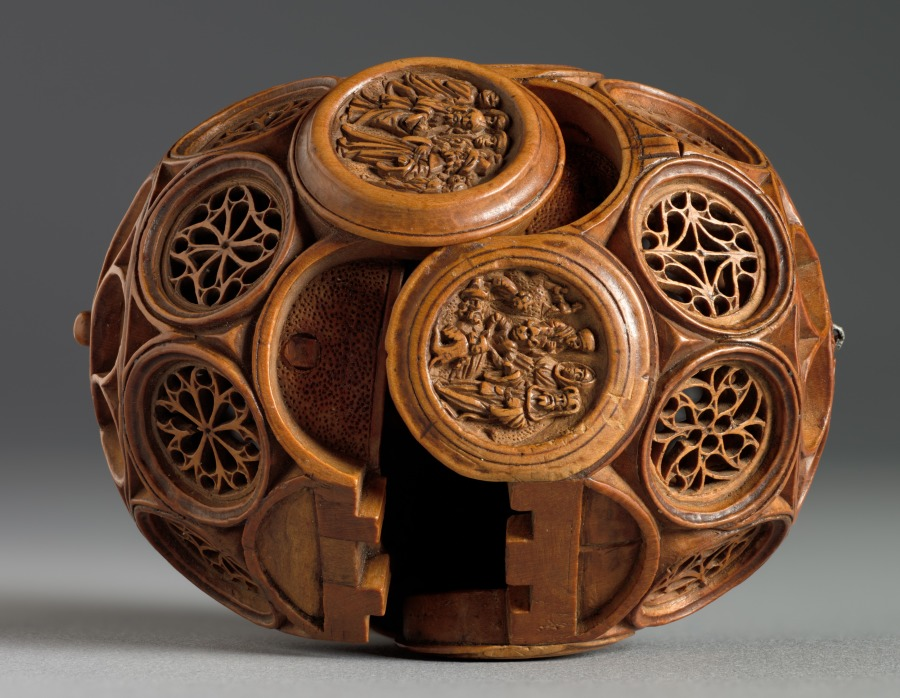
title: Prayer Nut with Scenes from the Life of St. James the Greater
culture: Northern Netherlands (Holland)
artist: Adam Dircksz (Netherlandish, active c. 1500)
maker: and Workshop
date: c. 1500–1530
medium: boxwood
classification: Sculpture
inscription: Interior around lower half: SANCTVS SACRILEGI STAT IVDICIS ANTE TRIBVNAL (Holiness stands before the throne of the profane judge)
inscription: Interior, around upper half: GAVDENS PRO CRISTO IACOBVS SVBDIT CAPVT ENSI (St James submits his head to the sword)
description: Prayer nuts are capsules that can be opened in half and were mainly worn from the end of the 1400s until 1530, particularly in the Netherlands. These objects are generally made from boxwood and carved with extreme refinement and delicacy. They often echo Gothic architecture and include openwork tracery or elaborate decorative patterns. Prayer nuts came into fashion for private devotion as a pendant on the rosary or on a decorative chain. The emergence of prayer nuts went hand in hand with the practice of praying the rosary more frequently at the end of the Middle Ages.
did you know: This miniature masterpiece was held and caressed within the palm of the holder as they prayed and meditated on their faith. What do you use to focus or engage in quiet concentration?